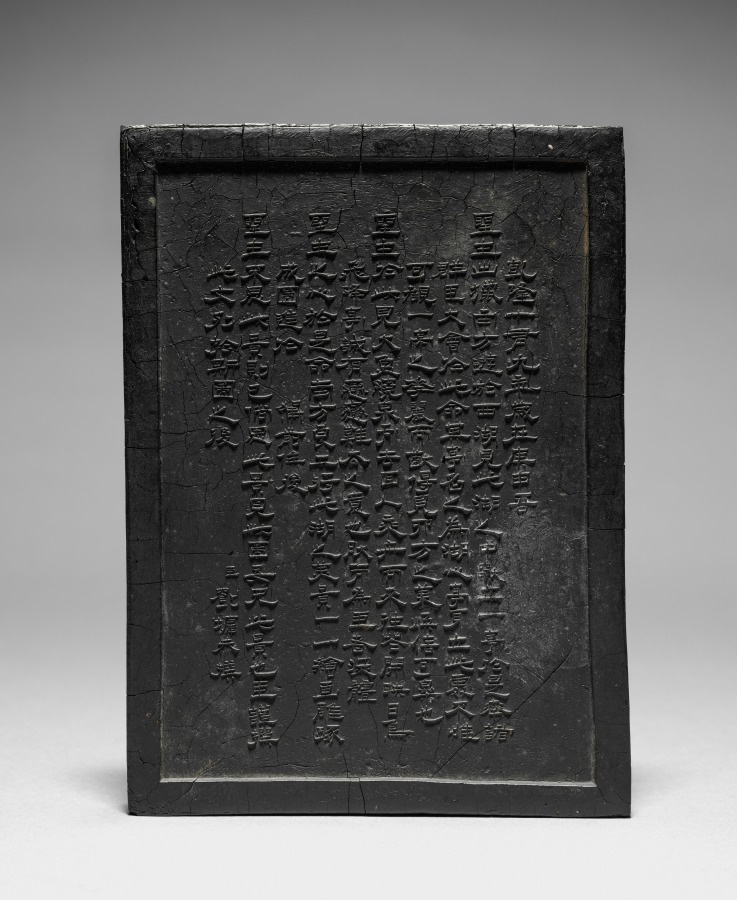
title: Ink Cake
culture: China, Qing dynasty (1644–1911), Qianlong reign (1736–95)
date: 1736–95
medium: ink cake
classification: Miscellaneous